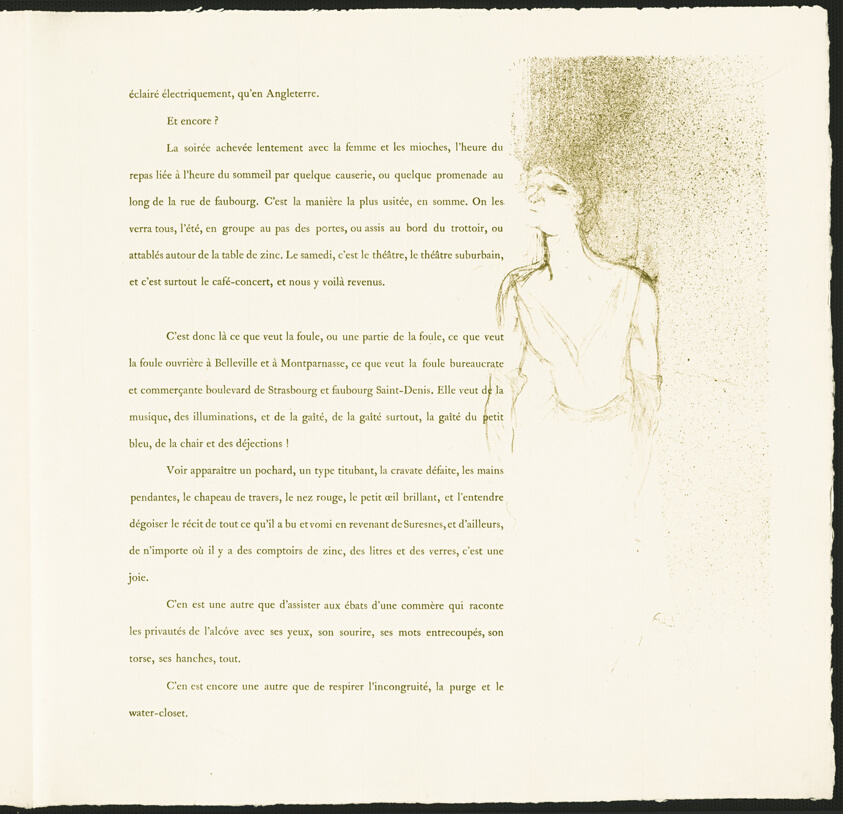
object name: Print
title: Yvette Guilbert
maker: Henri de Toulouse-Lautrec (French, 1864-1901)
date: 1894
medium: Lithograph with letterpress, on ivory laid paper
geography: France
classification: lithograph; print; prints and drawing